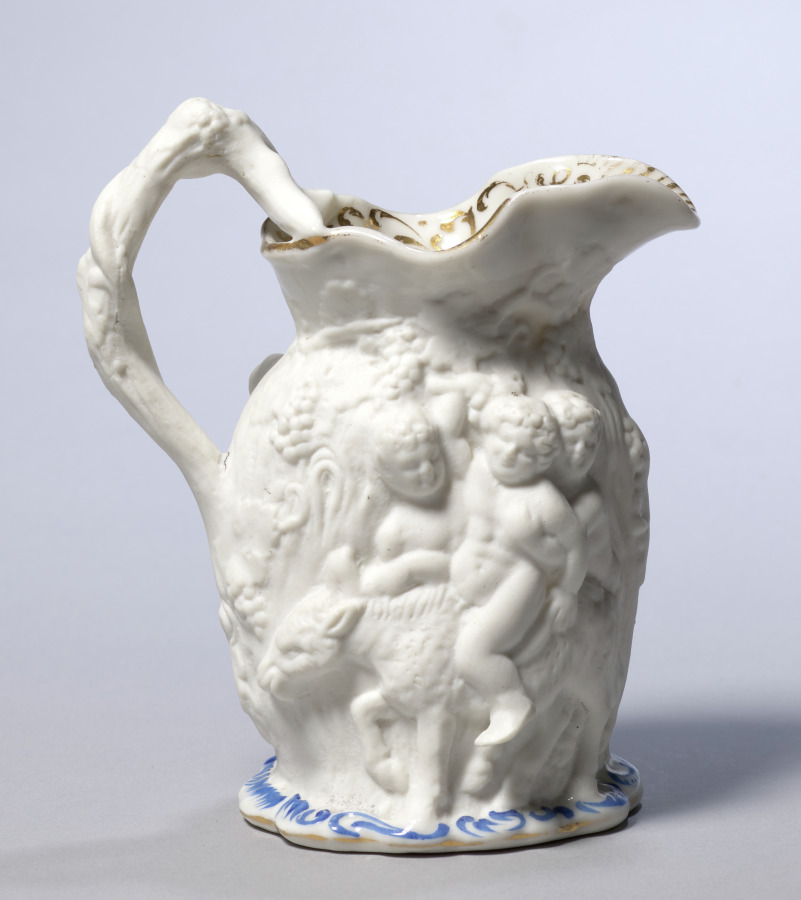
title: Jug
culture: France, 19th century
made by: Jacob Petit (French)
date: 1800s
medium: ceramic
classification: Ceramic